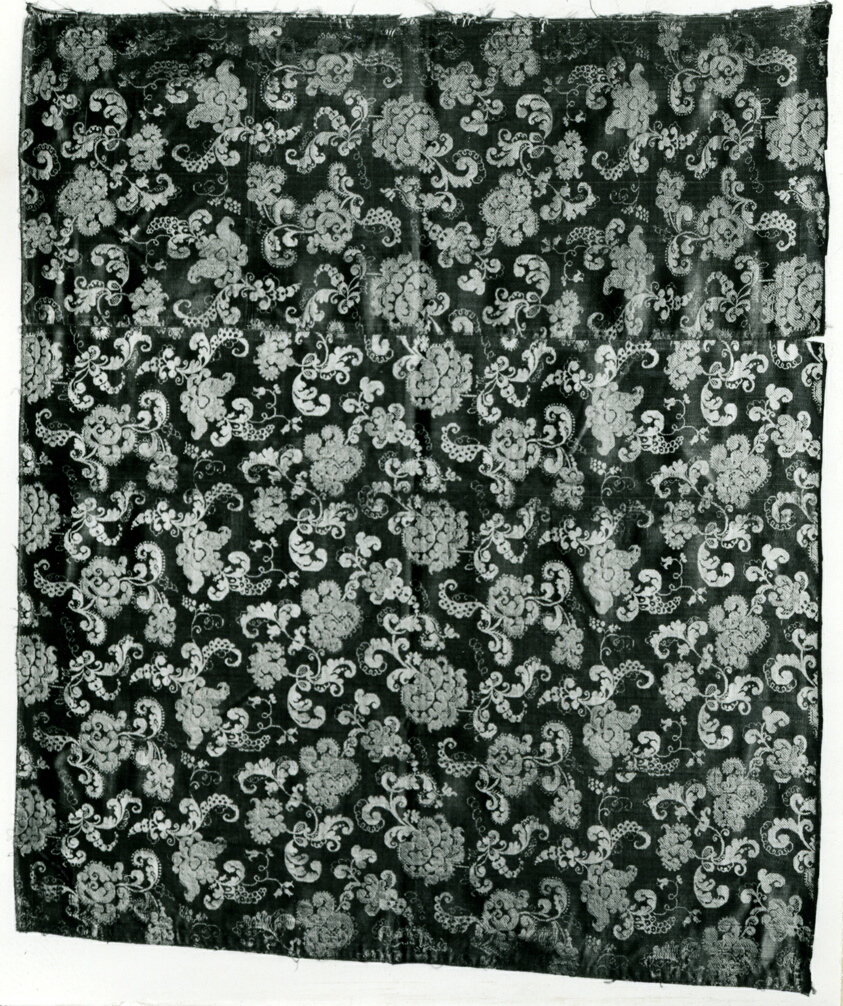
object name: Textile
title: Panel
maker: France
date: Early 18th century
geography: France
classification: textile; weaving